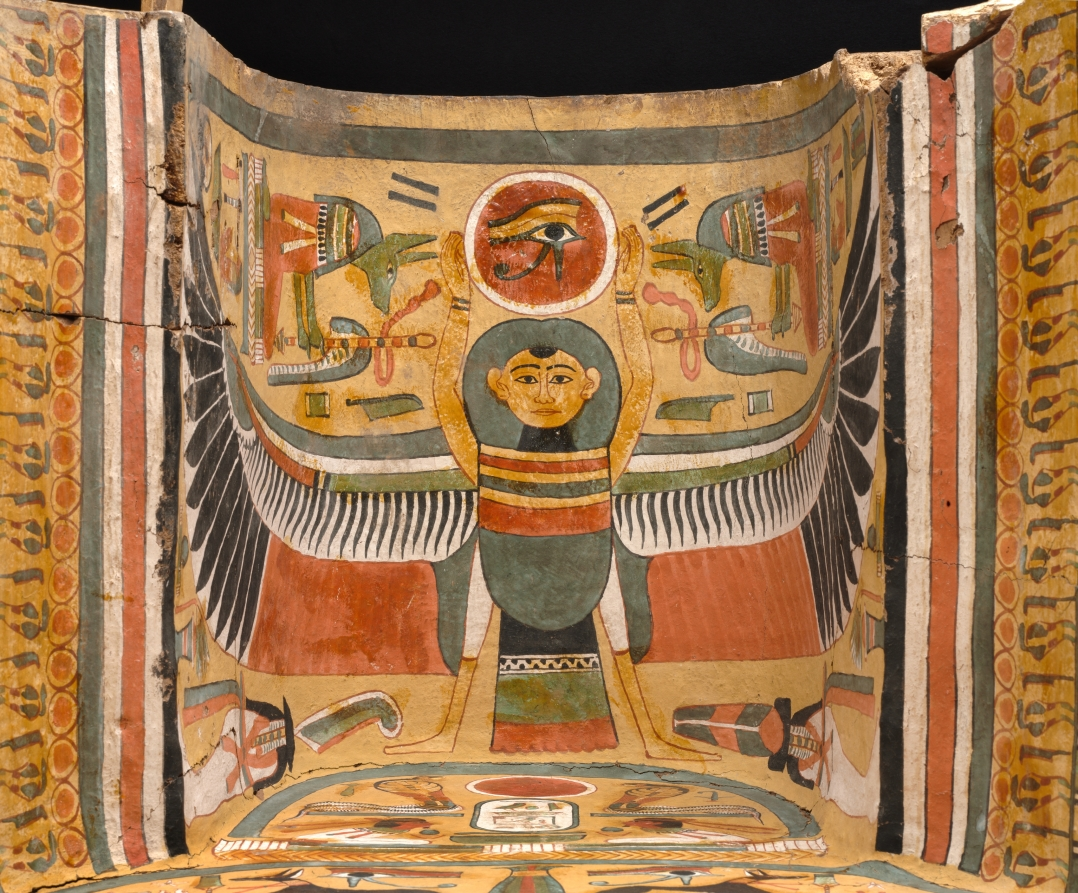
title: Coffin of Nesykhonsu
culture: Egypt, Thebes, Third Intermediate (1069–715 BCE), Dynasties 21–22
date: c. 976–889 BCE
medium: gessoed and painted sycamore fig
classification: Funerary Equipment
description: Egyptian coffins told stories and illustrated spells to help the deceased transition safely to the afterlife. Inside Nesykhonsu's coffin there are two jackals, one facing right and the other left, near the top. Here, the jackal represents the powerful deity Anubis, the god of the afterlife and embalming.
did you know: Two of Nesykhonsu's titles, "Lady of the House" and "Singer of the Choir of Mut the Great," are written on the outside of the coffin.